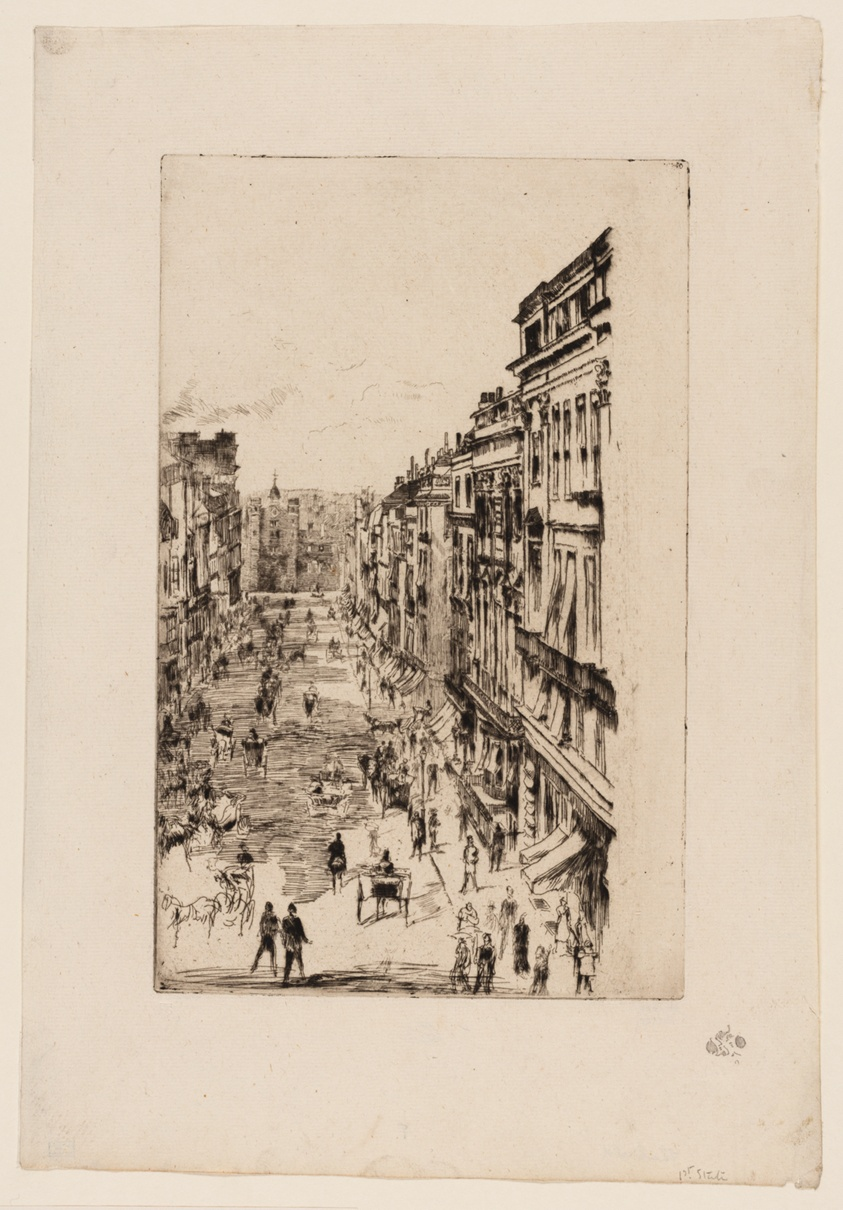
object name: Print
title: St. James's Street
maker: James McNeill Whistler (American, 1834-1903)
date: 1878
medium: Etching in black ink on off-white laid paper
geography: United States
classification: etching; print; prints and drawing; paper